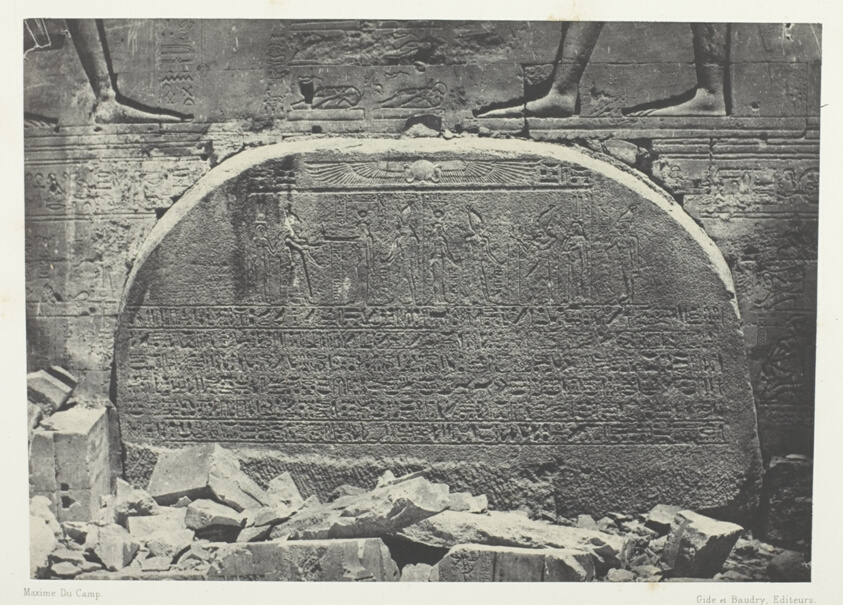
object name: Photograph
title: Grand Temple d'Isis à Philoe, Proscynéma (Acte d'Adoration); Nubie, plate 75 from the album "Egypte, Nubie, Palestine et Syrie" (1852)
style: 19th century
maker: Maxime Du Camp (French, 1822–1894)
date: 1849/51, printed 1852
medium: Salted paper print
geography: France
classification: salted paper print; photographic process; photography; photograph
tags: Collected by Hugh Edwards, Egypte, Nubie, Palestine et Syrie